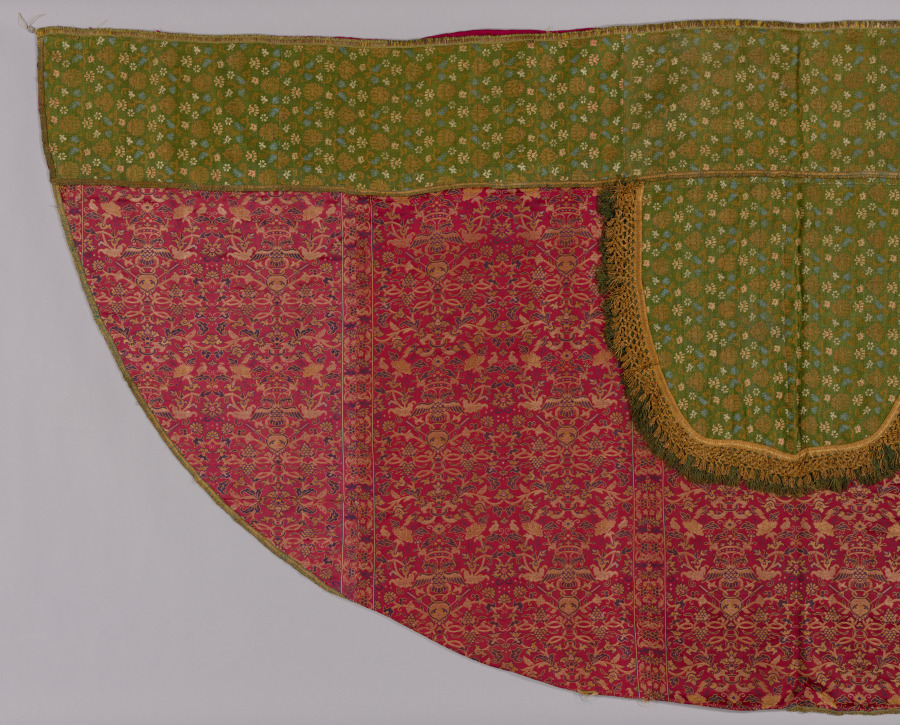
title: Cope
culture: China, Macao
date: 1500s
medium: Silk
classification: Garment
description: Silk fabric woven in China with European motifs was transported by European traders by the early 16th century. This popular pattern features a crowned double-headed eagle grasping arrows in its claws above a vase emitting blossoming vines. The eagle motif was derived from the Habsburg coat of arms, rulers of Spain and Austria during the 1500s and 1600s. Vertical borders with Chinese flora occur near the selvages of the five silk lengths forming the cope. The gilt-metal braided and fringed hood and broad orphrey band, or ornamental border, along the front edges feature fashionable small-scale floral sprigs.